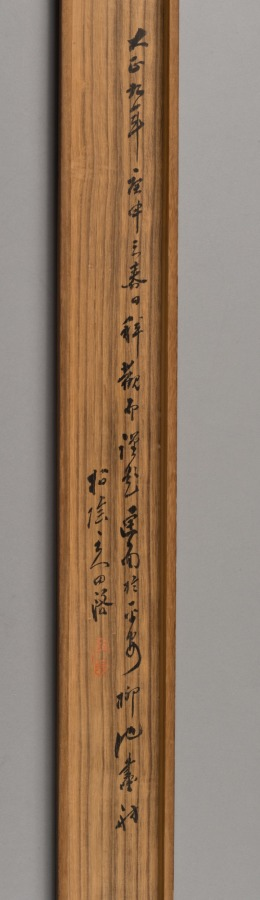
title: Sunset over Autumn Mountains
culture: Japan, Edo period (1615–1868)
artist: Hoashi Kyōu (Japanese, 1810–1884)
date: 1869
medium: hanging scroll; ink and light color on silk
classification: Painting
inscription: translation of poem [by Nora Liu]: The way was forgotten while enjoying the conversation and colors of Autumn, The road entered among the red trees and the white clouds, The trace of a path led to the lonely temple where the monks received enlightenment, The sound of chimes echo remotely in the mountains where the sunset falls. In the year 1869, Kyou